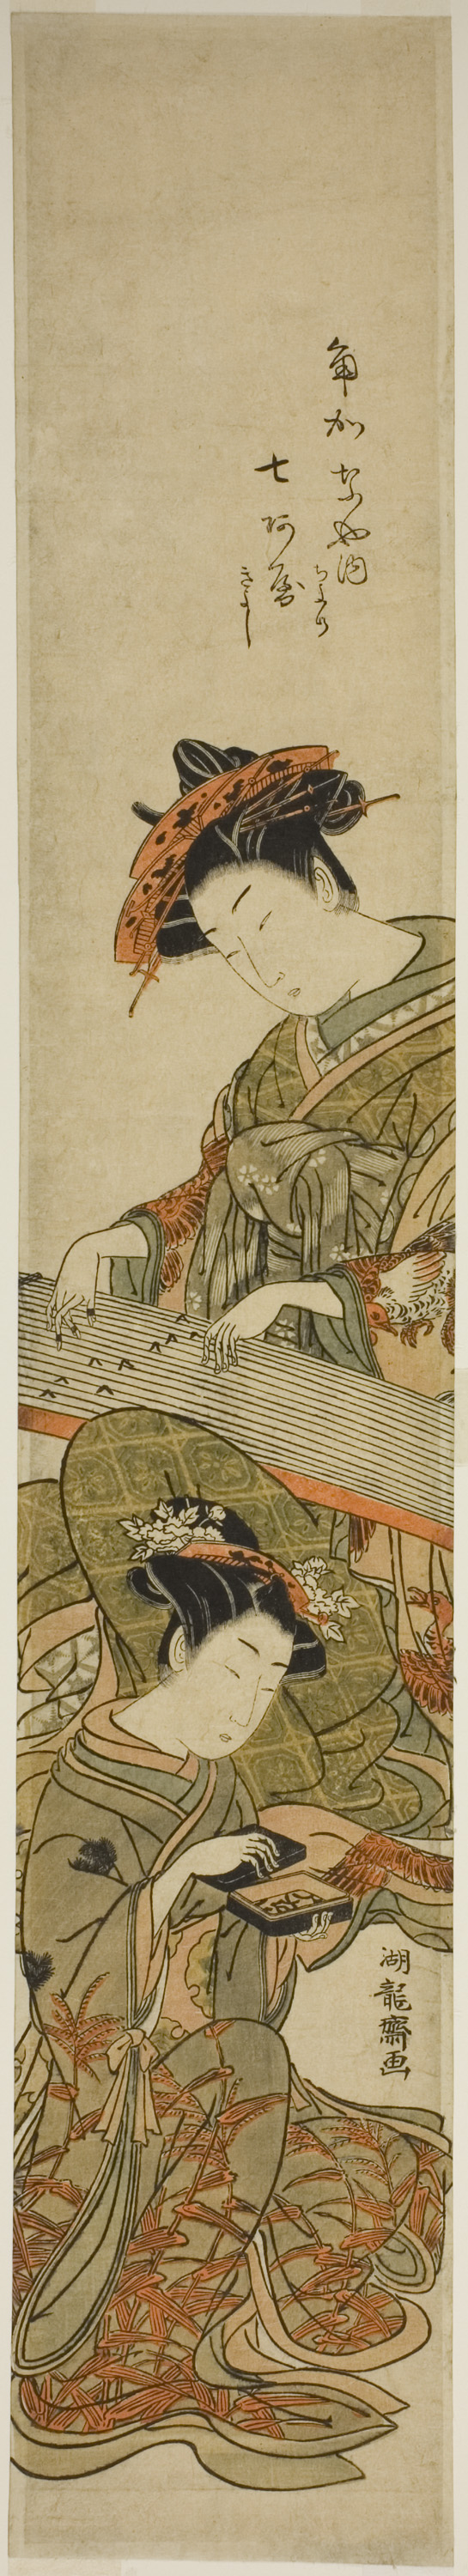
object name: Print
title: The Courtesan Nanaaya of the Kadokanaya and Her Attendant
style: Japanese (culture or style)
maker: Isoda Koryusai (Japanese, 1735-1790)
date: c. 1776/81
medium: Color woodblock print; hashira-e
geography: Japan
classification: woodblock print; print; asian art